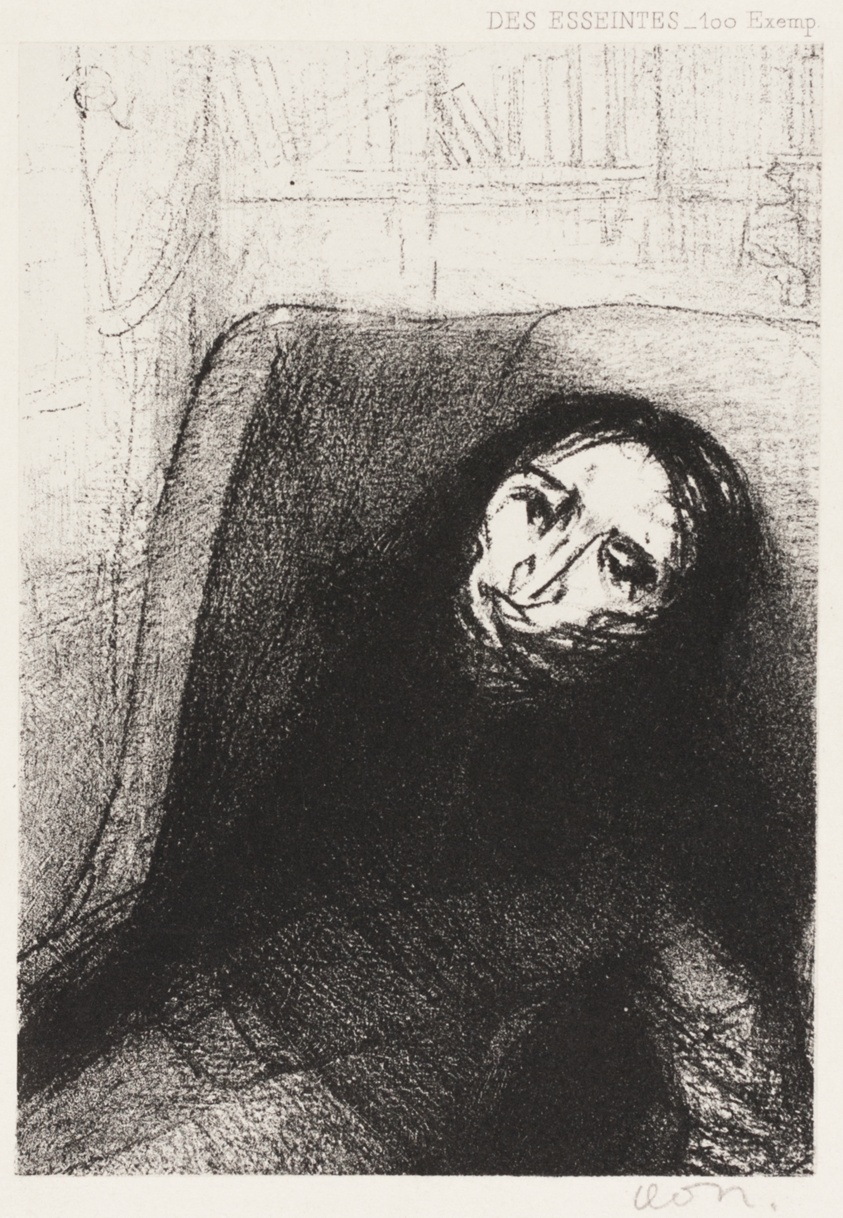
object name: Print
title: Des Esseintes, Frontispiece for A Rebours by J.K. Huysmans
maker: Odilon Redon (French, 1840-1916)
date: 1888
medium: Lithograph in black on light gray China paper laid down on white wove paper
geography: France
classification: lithograph; print; prints and drawing; paper